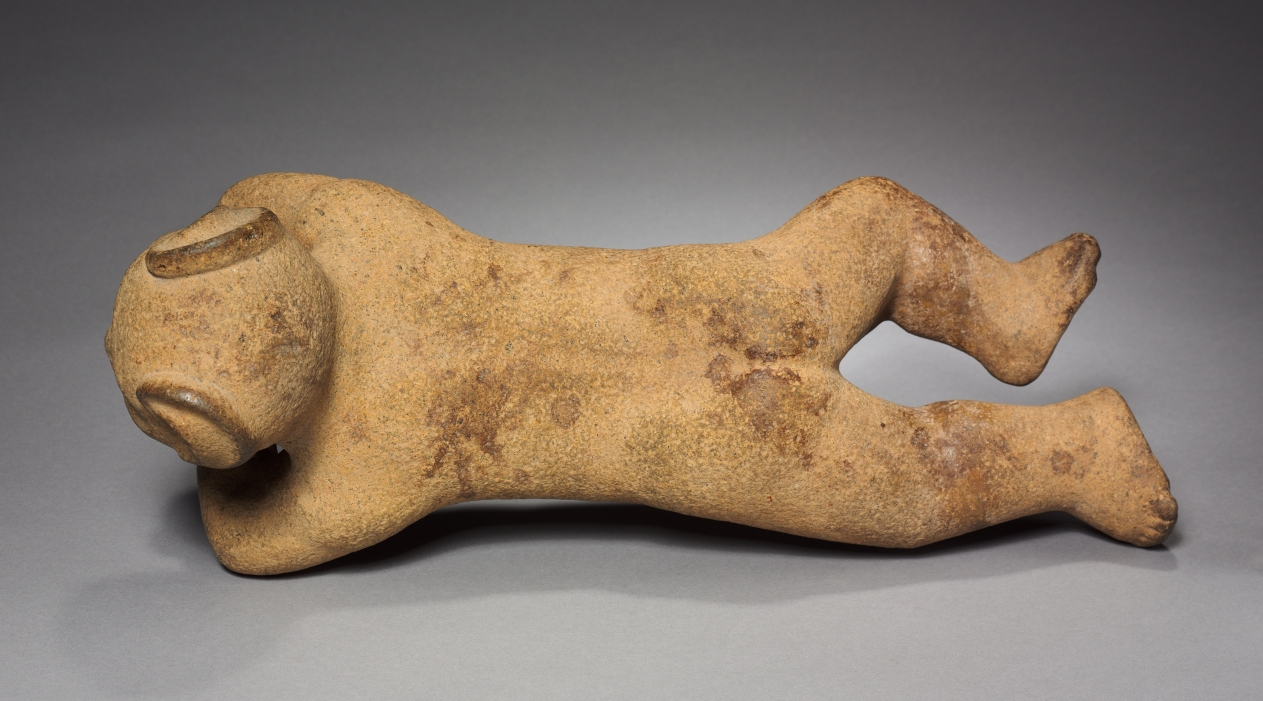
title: Reclining Figure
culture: Mexico, Gulf Coast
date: 300–600 CE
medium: stone, pigment traces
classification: Sculpture